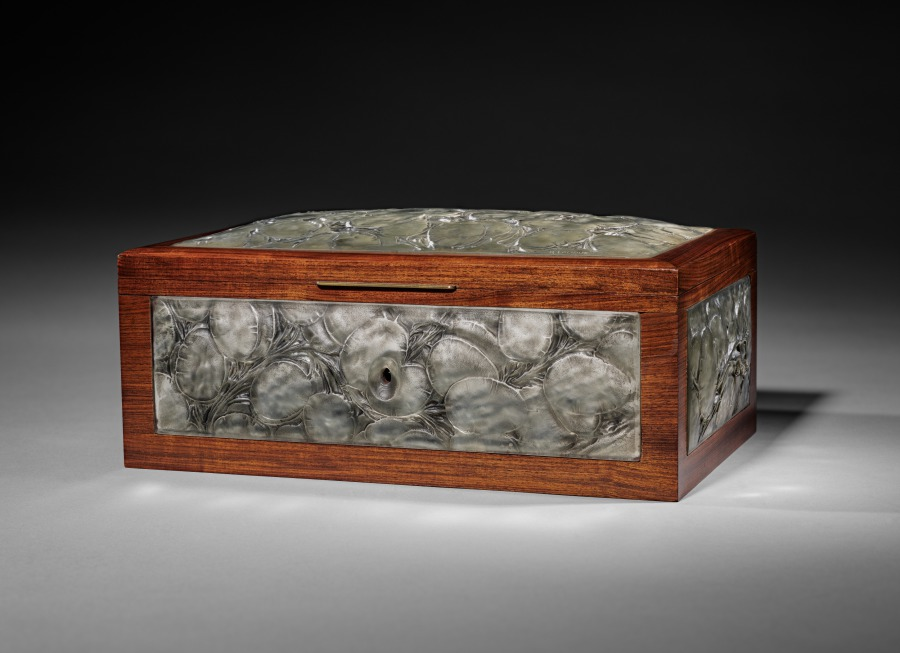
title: Monnaie du Pape Coffer (coffret)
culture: France, 20th century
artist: René Lalique (French, 1860–1945)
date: c. 1914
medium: wood, bombé glass panels with gray patina, metal key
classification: Mixed Media